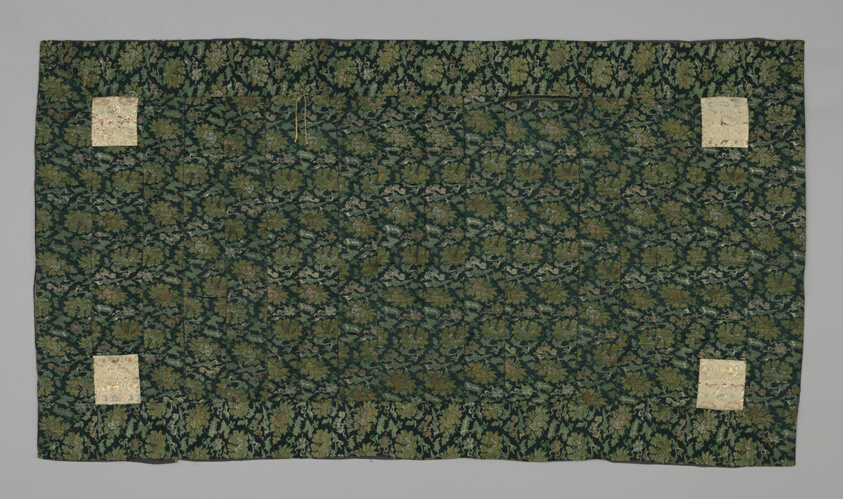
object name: Textile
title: Kesa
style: edo (japanese period)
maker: Japan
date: Edo period (1615–1868), late 18th century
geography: Japan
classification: textile; silk; asian art; liturgical - buddhist; costume; weaving